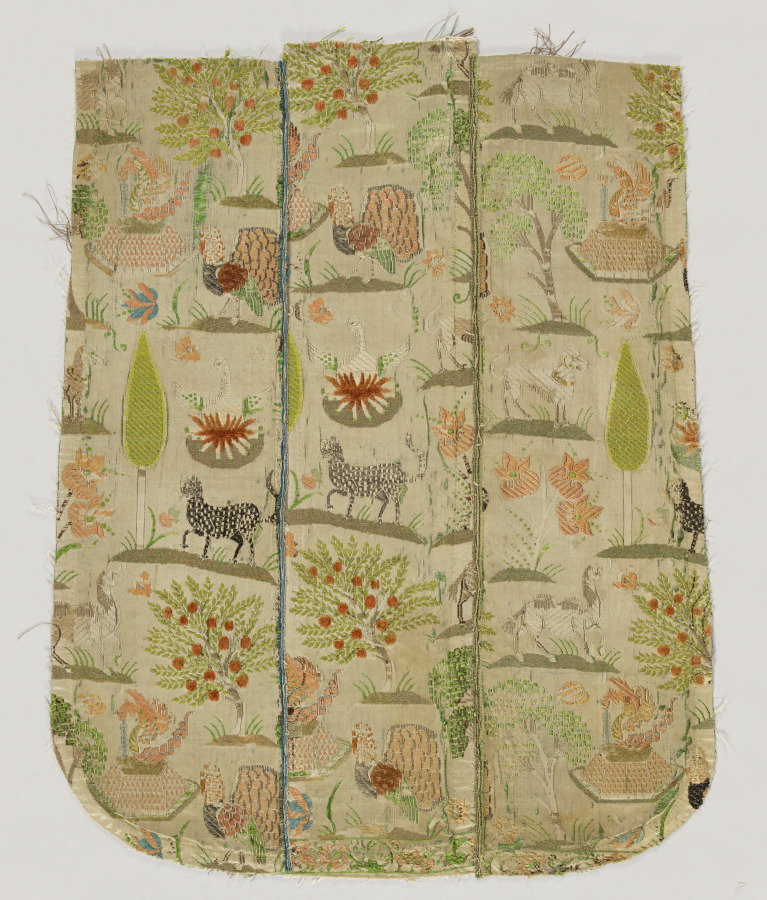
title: Half Chasuble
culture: Spain, Valencia, 18th century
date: 18th century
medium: plain compound cloth, brocaded; silk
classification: Textile